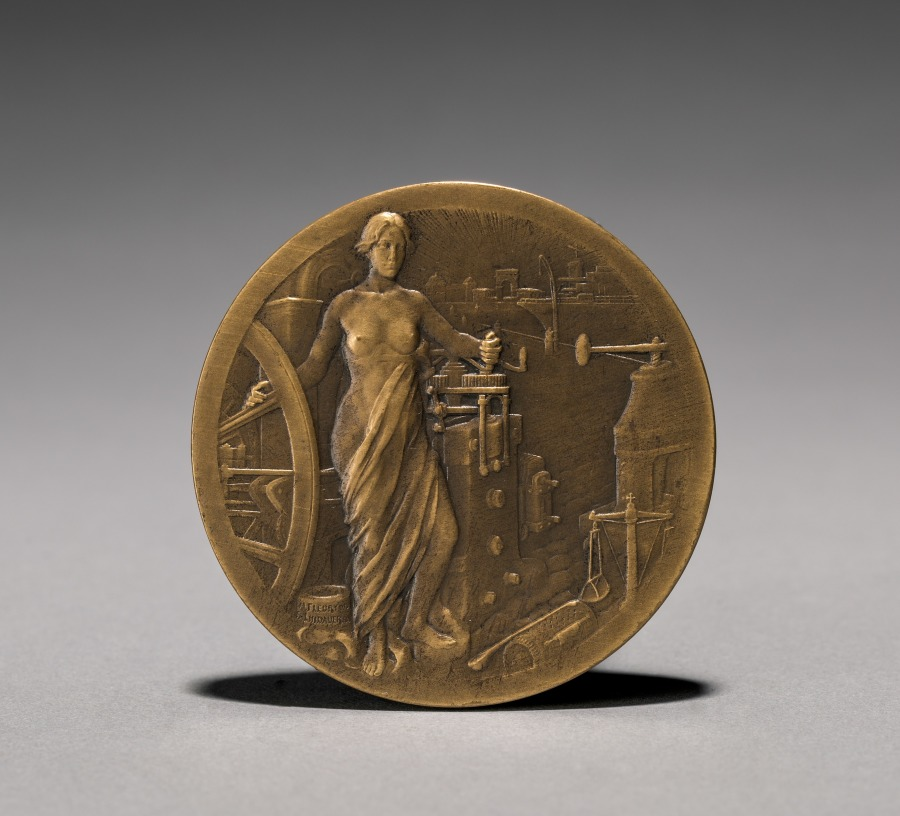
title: Medal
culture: France, 20th century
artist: Edmond-Eugene-Emile Lindauer (French, 1869–1942)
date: 1918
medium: bronze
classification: Metalwork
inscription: reverse - "La Monnaie au Port de Rochefort"